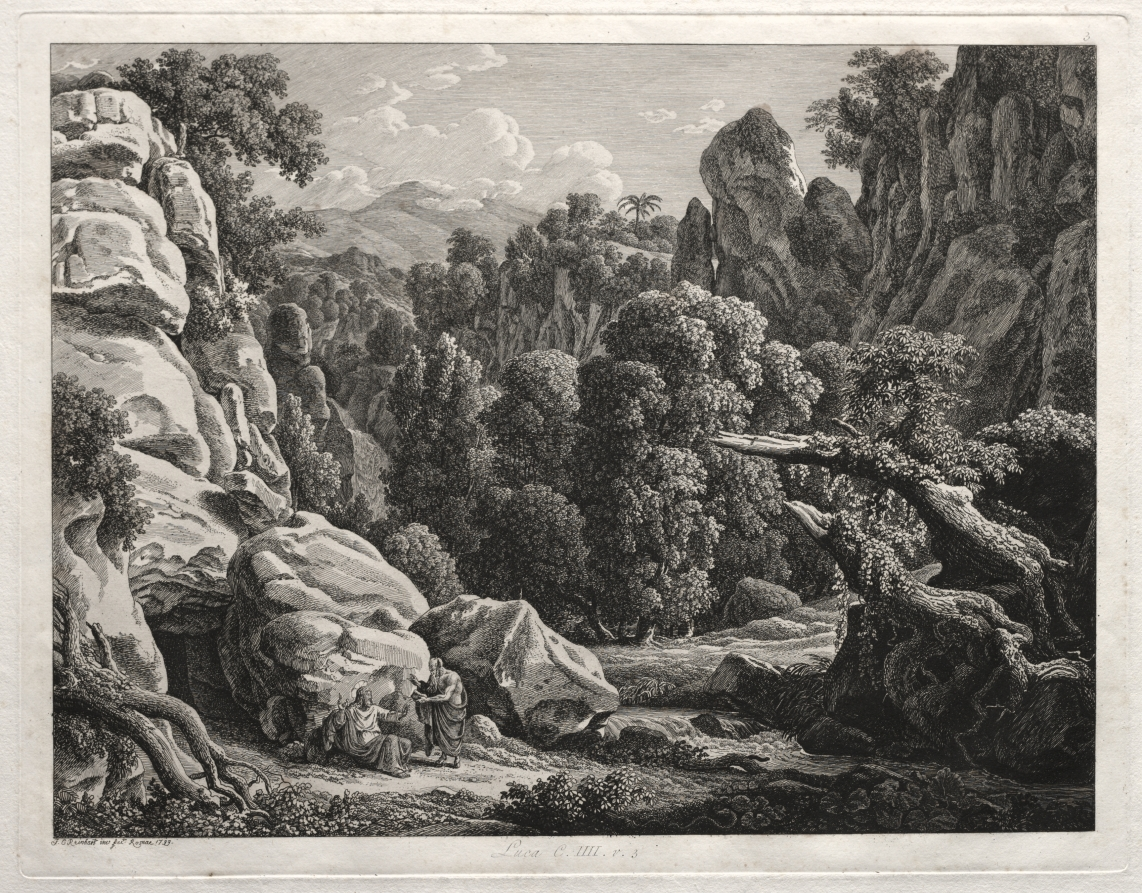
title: Heroic Landscape: Landscape with the Temptation of Christ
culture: Germany, 19th century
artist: Johann Christian Reinhart (German, 1761–1847)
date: 1799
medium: etching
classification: Print